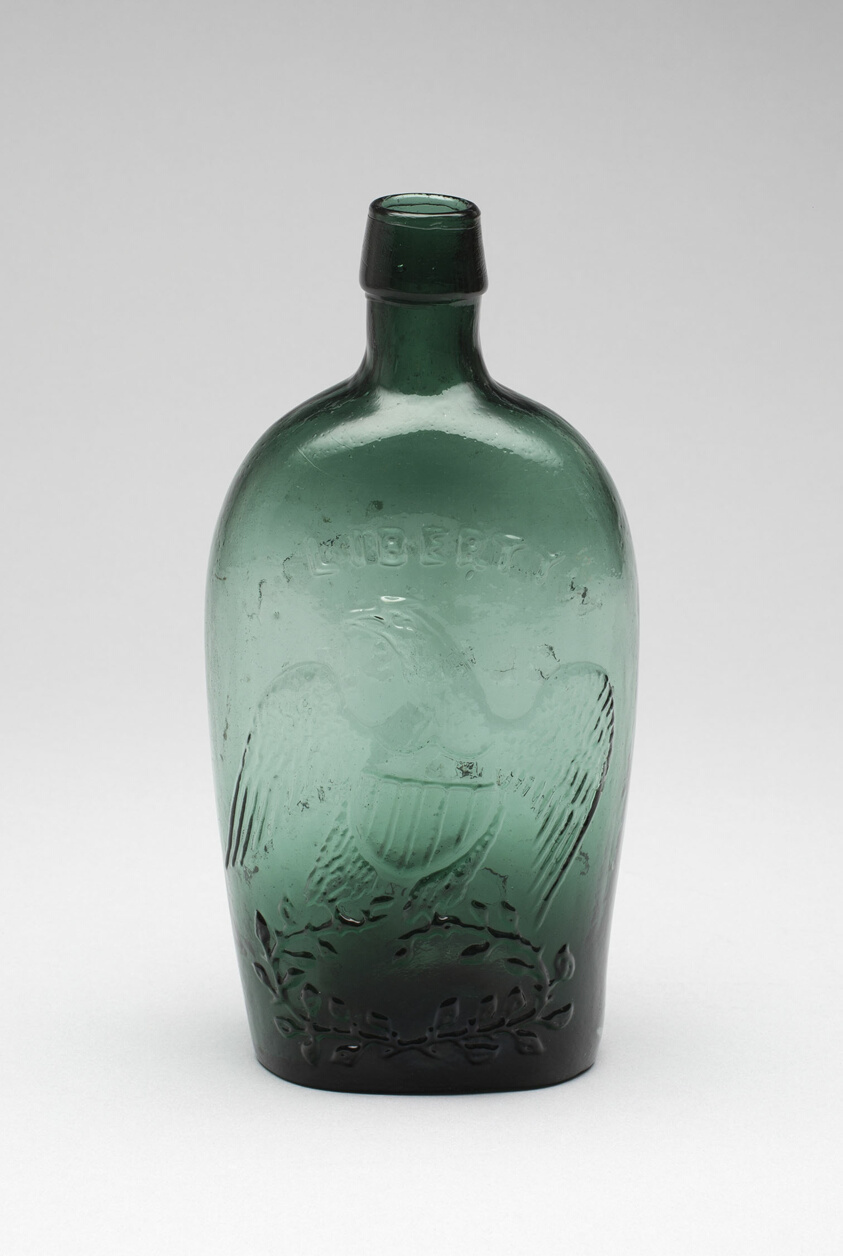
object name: Glass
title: Flask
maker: West Willington Glassworks (American, 1814–1872); West Willington, Connecticut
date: c. 1850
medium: Glass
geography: Bohemia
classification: flask (bottle); american decorative arts; glass (object genre); decorative arts